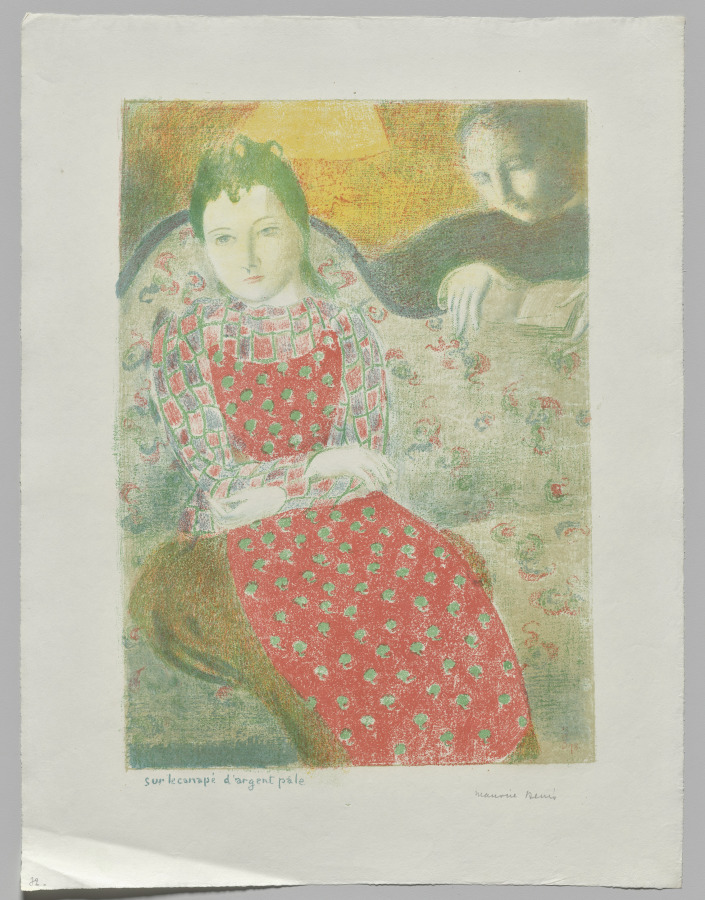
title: On the Pale Silver Sofa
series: Love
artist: Maurice Denis (French, 1870–1943)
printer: August Clot (French, 1858–1936)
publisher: Ambroise Vollard (French, 1867–1939)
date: 1899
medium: color lithograph on wove paper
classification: Print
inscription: Recto, lower left: “sur le canapé d’argent pale”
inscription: In graphite, recto, lower right: “Maurice Denis (signed)”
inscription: In red, recto, lower right within image: “D98 (?)”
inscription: In graphite, recto, lower left: “12”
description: Maurice Denis belonged to the Nabis, a group of artists who came together in 1889 to pursue a radical new style informed by subjective experience and emotion. This print is from a series in which Denis explored his devotion to his wife, Marthe, by depicting her in a variety of settings alongside titles drawn from his own journal. The vague but evocative images were meant to encourage the viewer to draw connections to the theme and meditate on its meaning.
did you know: Maurice Denis was a devout Catholic and often drew visual connections between his wife, Marthe, the subject of this print series, and the Virgin Mary.